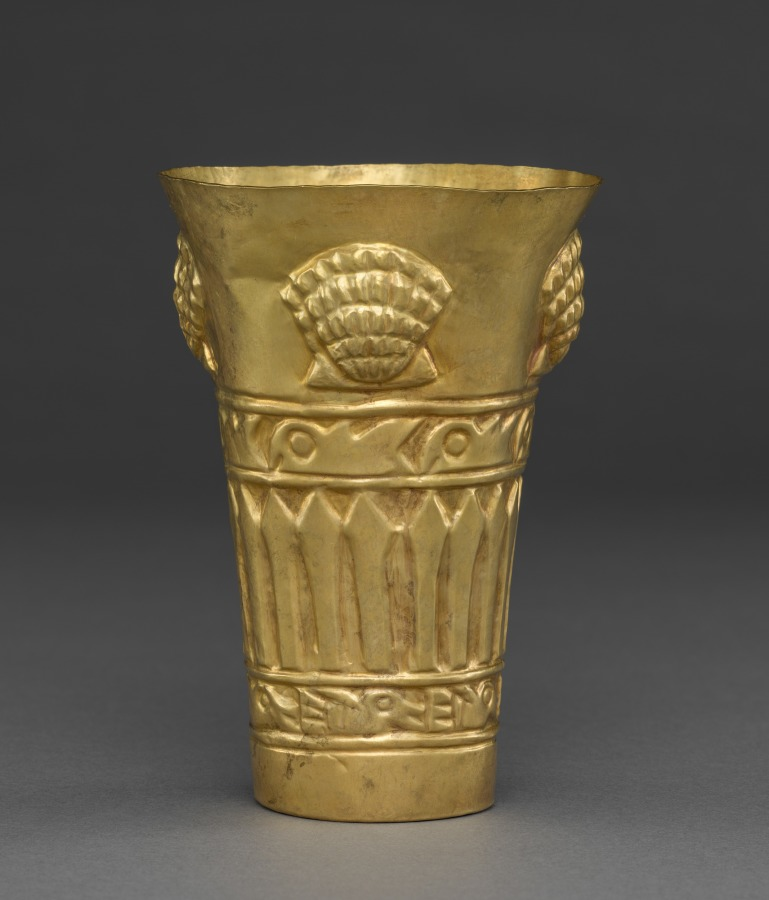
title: Beaker with Shells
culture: Central Andes (Peru), Lambayeque (Sicán) people, 10th century-12th century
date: 900–1100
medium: gold, hammered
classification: Metalwork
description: This beaker was created by an artist of the Lambayeque culture of Peru's north coast. Shells appear in the upper register representing spondylus, the red-orange thorny oyster greatly valued by pre-Hispanic Andean societies. If such beakers were used in life—that is, not created exclusively for the lavish tombs in which they have been found in quantities—they may have figured in feasting events that were central to late pre-Hispanic political, social, and religious life.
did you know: Highly valued as a luxury material, spondylus shells served as symbols of power and prestige.